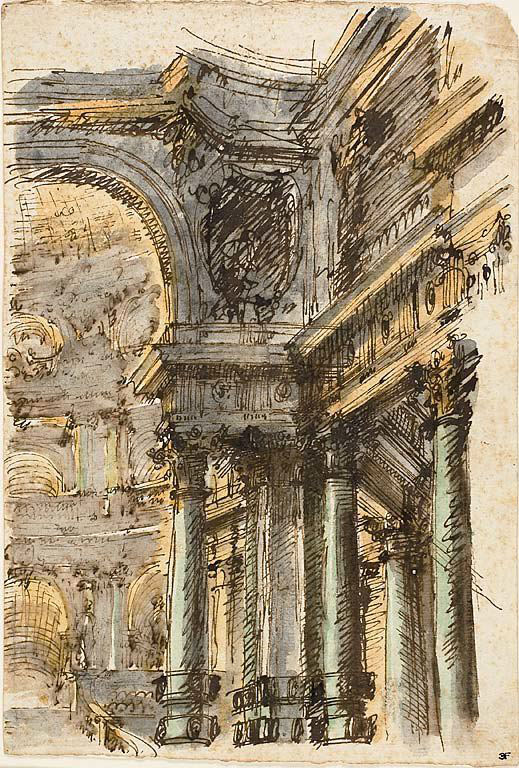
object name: Drawing and Watercolor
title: Architectural Fantasy (recto); Architectural Details (verso)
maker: Mauro Antonio Tesi (Italian, 1730-1766)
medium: Pen and brown ink, brush and brown wash, and watercolor (recto), nad pen and brown ink with brush and gray and brown wash (verso), on ivory laid paper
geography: Italy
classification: drawings (visual works); prints and drawing